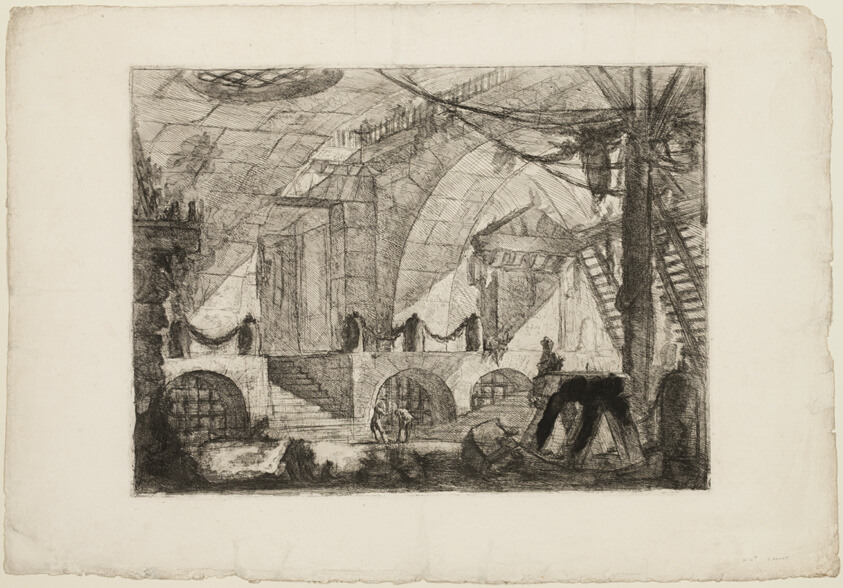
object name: Print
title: The Sawhorse, plate 12 from Imaginary Prisons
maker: Giovanni Battista Piranesi (Italian, 1720-1778)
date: c. 1750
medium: Etching and engraving on heavy ivory laid paper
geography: Italy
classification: etching; print; prints and drawing